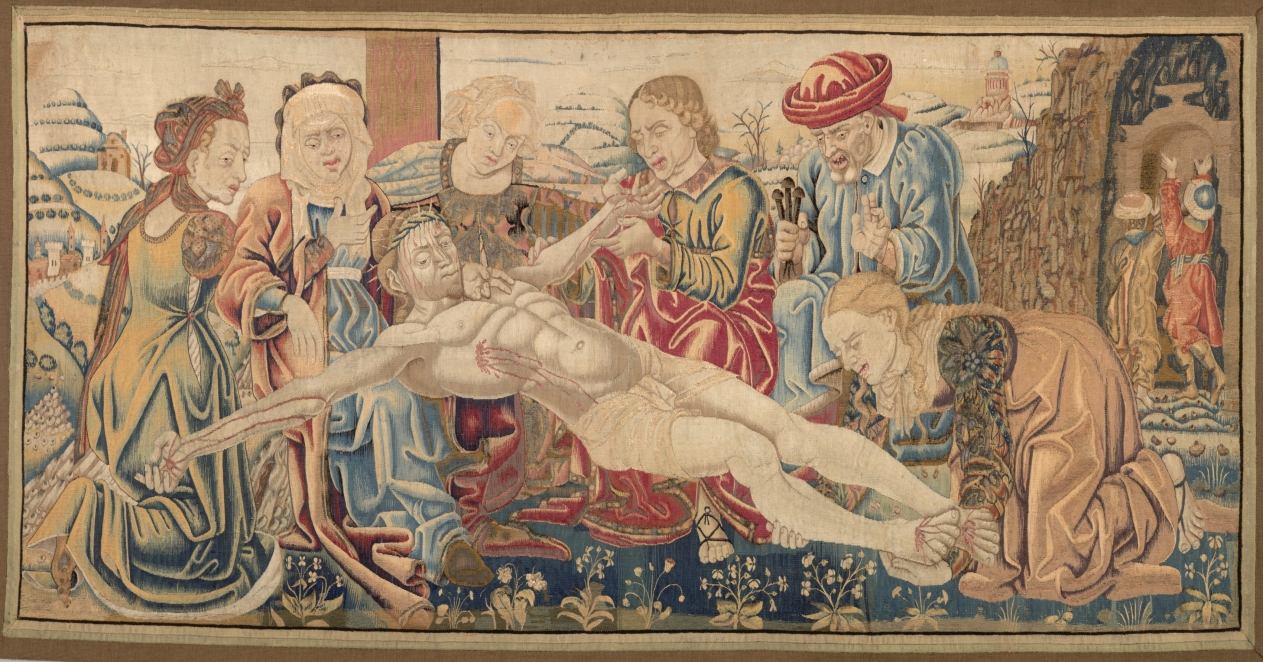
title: Altar Frontal with the Lamentation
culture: Italy, Ferrara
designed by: attributed to Cosimo Tura (Italian, c. 1430–1495)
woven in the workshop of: Rubinetto de Francia (Italian, active 1457–1483)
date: c. 1474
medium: Wool, silk, gold and silver threads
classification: Tapestry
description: A decorative textile suspended along the altar’s entire front, an altar frontal was often embellished with gold and silver threads, as seen here. This rare example depicts the lamentation of Christ, a common subject in Christian art in which the body of Christ is mourned after its removal from the cross. This version is highly acclaimed for its emotional intensity. Christ’s body is arranged in the shape of the cross, his shoulder rests on the Virgin’s knees, Saint John the Evangelist cradles his left arm, and Mary Magdalene supports his feet. Joseph of Arimathea carries the three nails with which Christ was crucified. This altar cloth was designed by Cosimo Tura who was employed at the court of Ercole I d’Este, duke of Ferrara, as a painter, illuminator, and tapestry designer between 1475 and 1484. His design was woven by Rubinetto di Francia, who was head of a large tapestry workshop at Ercole’s court. The subject of the design would imply its use during the Easter season.